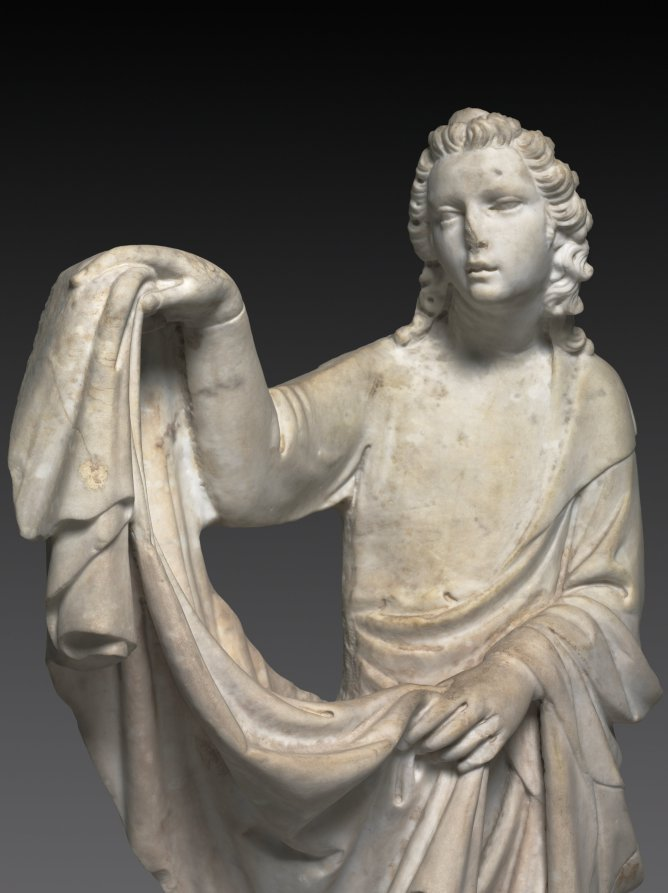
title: Angel from a Tomb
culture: Italy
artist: workshop of Tino di Camaino (Italian, c. 1285–1337)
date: 1330–50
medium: marble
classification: Sculpture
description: Tino da Camaino was active in Siena, Pisa, and Florence after 1311 where he established his reputation as an important and gifted sculptor. In 1323 he was summoned to the Angevin court at Naples, probably by King Robert of Anjou to work on the sepulchral monument of the king's daughter-in-law, Catherine of Austria. During the remainder of his life, Tino created a remarkable series of tomb sculptures in Naples. This pair of marble angels most likely represents the work of a member of Tino's workshop produced for one of these Neapolitan tombs, either during the final years of the master's life, or else independently after Tino's death in 1337.